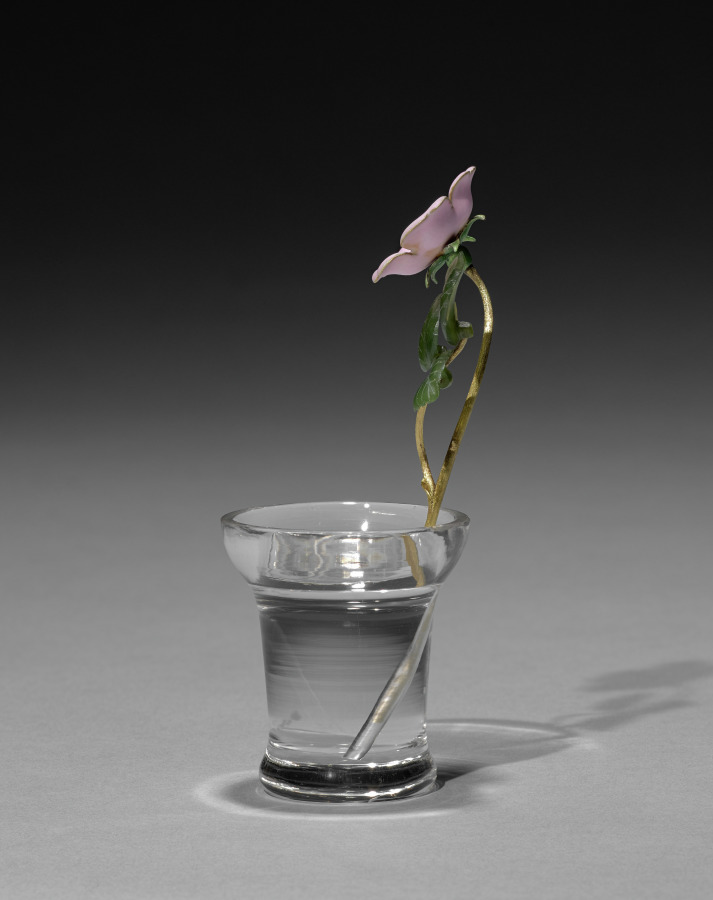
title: Flower Study of a Wild Rose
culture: Russia, St. Petersburg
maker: House of Fabergé (Russian, 1842–1918)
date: c. 1885–1915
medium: gold, silver, enamel, diamond, jade, rock crystal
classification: Miscellaneous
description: This delicate flower study resembles a stem of wild rose. Fabergé’s inspiration for his flower studies is said to have come from the floral brooches of precious stones that were made in the 1700s for Catherine the Great as well as from the Japanese art of flower arranging, known as ikebana. Small and delicate, Fabergé’s flower studies were given as intimate gifts to friends by the tsarina and others in the court. She also liked to take them around to wherever the imperial family was residing as a reminder of spring during the harsh Russian winters.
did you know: The stems of Fabergé’s flower studies are set into little basins carved from rock crystal to resemble pots of water.